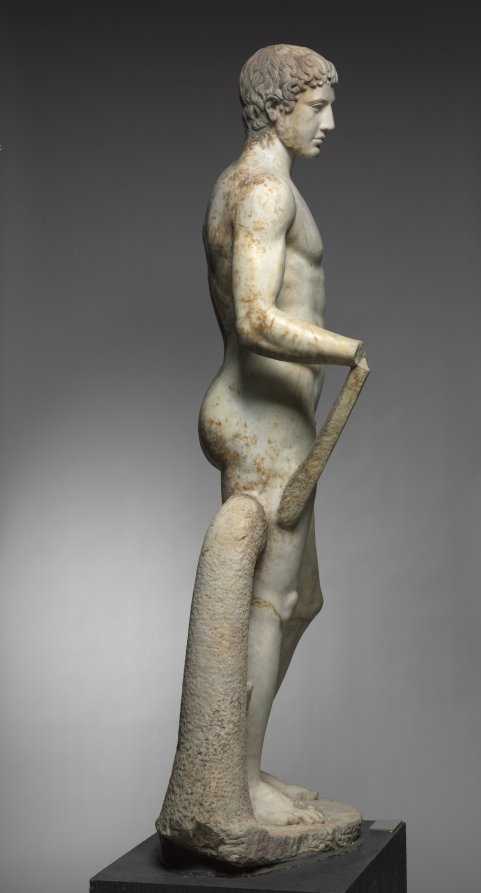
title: Statue of an Athlete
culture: Italy, Roman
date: 1–100 CE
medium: marble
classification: Sculpture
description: This idealized athlete recalls Greek sculptural types invented and popularized during the 400s BC. Large-scale athletes and other sculptures like this were originally created by famous artists as sanctuary dedications. Centuries later, they were widely copied and adapted by Roman sculptors, whose clients sought their own versions of earlier masterpieces. Working in marble rather than bronze, these sculptors added certain elements for stability, such as the struts and the large tree trunk beside the right leg here. Sculptures like this one are profoundly complex, made by and for Romans but descended from Greek ancestors.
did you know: For many years, this sculpture stood in the rotunda of the Cleveland Museum of Art.